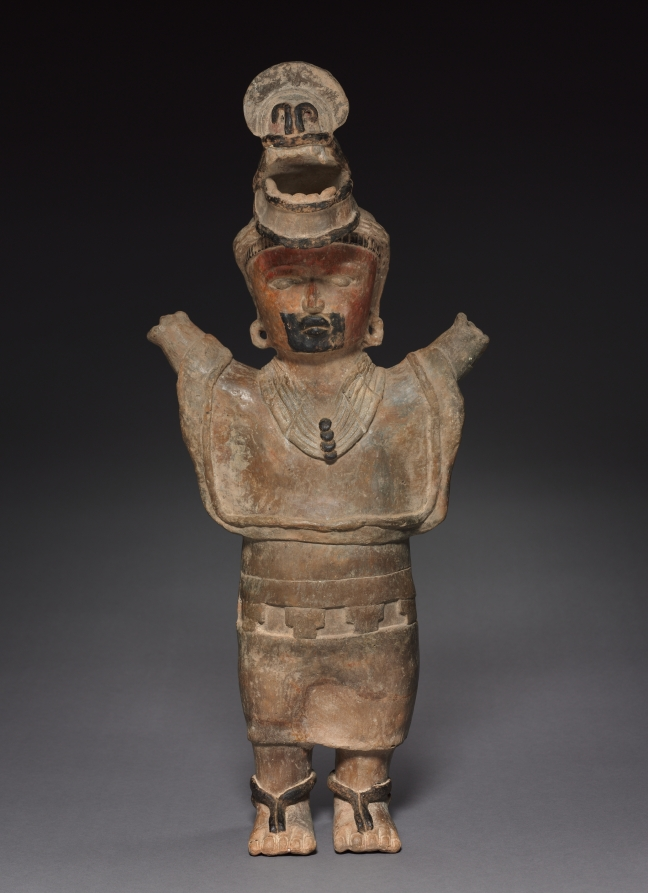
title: Standing Female Figure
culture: Mexico, Veracruz, Veracruz Monumental Sculpture type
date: 600–900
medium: burnished pottery with orange slip, traces of red and white pigment, and asphalt paint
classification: Sculpture